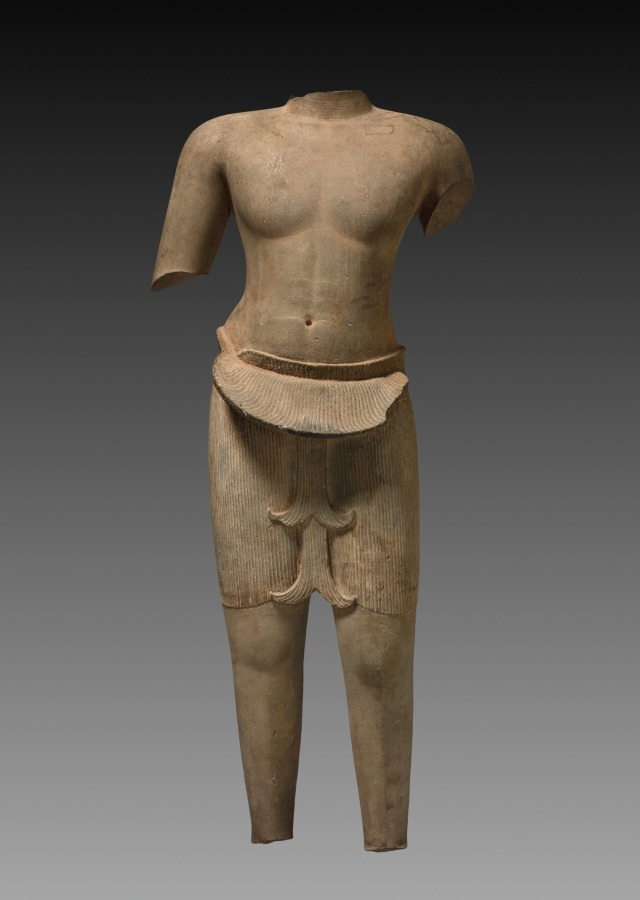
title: Male Deity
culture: Cambodia, Koh Ker-Khleong style, 10th century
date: 925–50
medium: sandstone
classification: Sculpture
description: The distinctive swath of pleated cloth and the anchor-shaped ends of the lower garment suggest that this sculpture was made when this method of wrapping the sampot was fashionable. During that time, Cambodian temples were dedicated to Hindu deities, whose images were dramatically installed alone on a pedestal in a temple's sanctum. When consecrated, gold tokens were installed under the pedestal; many sculptures were broken when people toppled them to get the gold.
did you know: This male deity seems to be striding with his left leg advanced subtly forward.